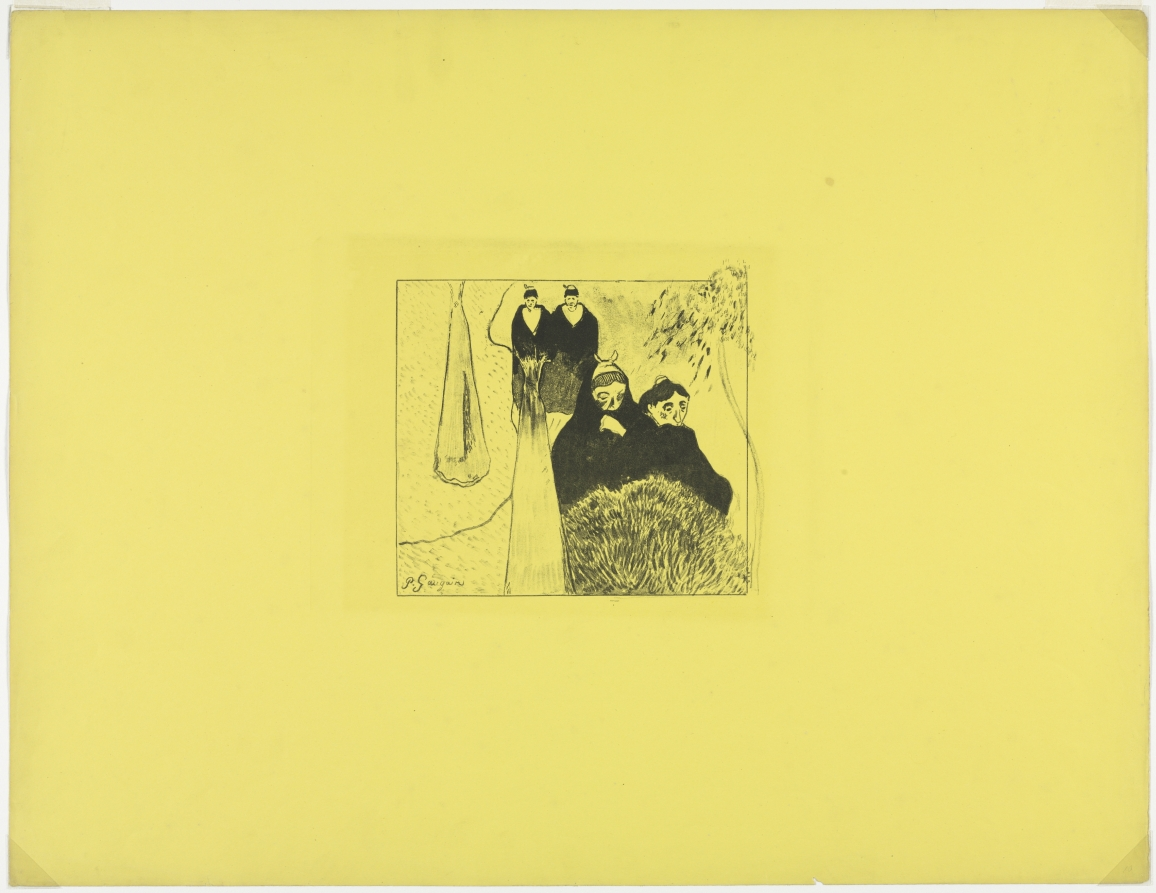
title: Volpini Suite: Old Women of Arles (Les Vieilles Filles [Arles])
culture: France, 19th century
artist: Paul Gauguin (French, 1848–1903)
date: 1889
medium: zincograph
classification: Print